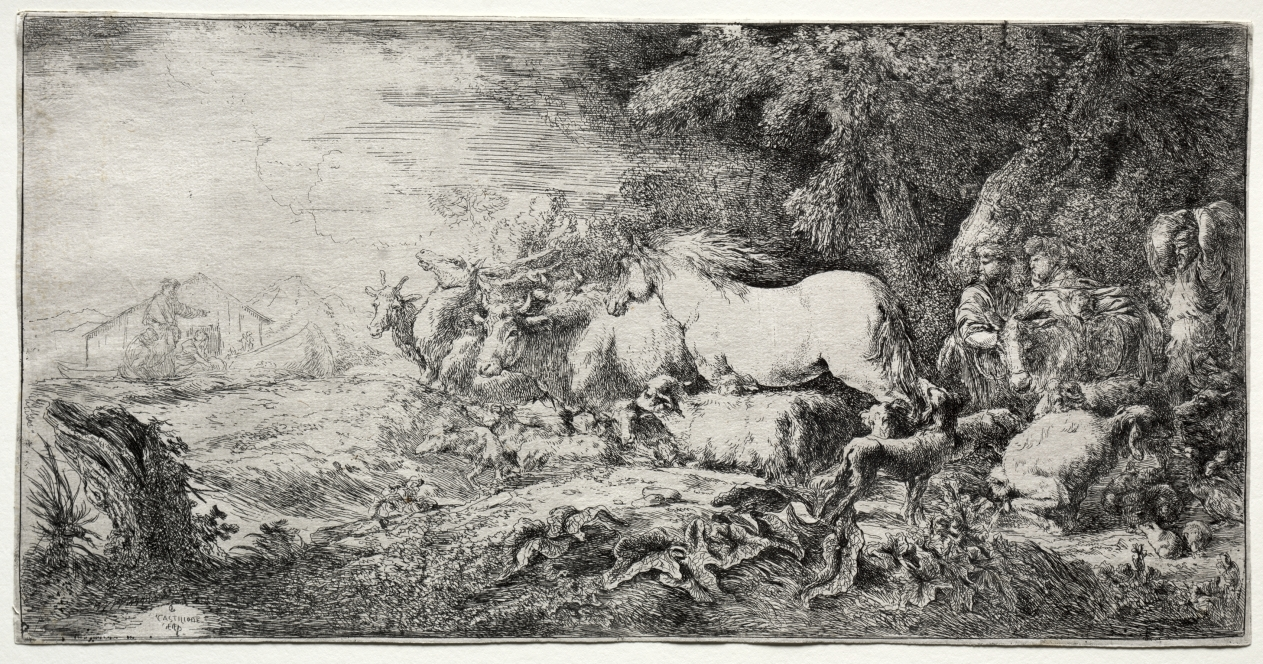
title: Noah and the Animals Entering the Ark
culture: Italy, 17th century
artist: Giovanni Benedetto Castiglione (Italian, 1609–1664)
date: 1650–55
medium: etching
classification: Print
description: Animals were among Giovanni Benedetto Castiglione’s favorite subjects, leading him to frequently depict the biblical story of Noah’s Ark. Here, a group of men guide horses, deer, dogs, goats, and even guinea pigs toward the ark. After viewing etchings by his contemporary Rembrandt, whose work was not yet known widely in Italy, Castiglione recognized the potential of the medium. He emulated the Dutch master’s sketchy, draftsman-like approach and created a recession into space by combining deeply and lightly etched lines. The lush landscape, with its complicated layers of vegetation that swirl with movement, is a distinctive feature of Castiglione’s technique.